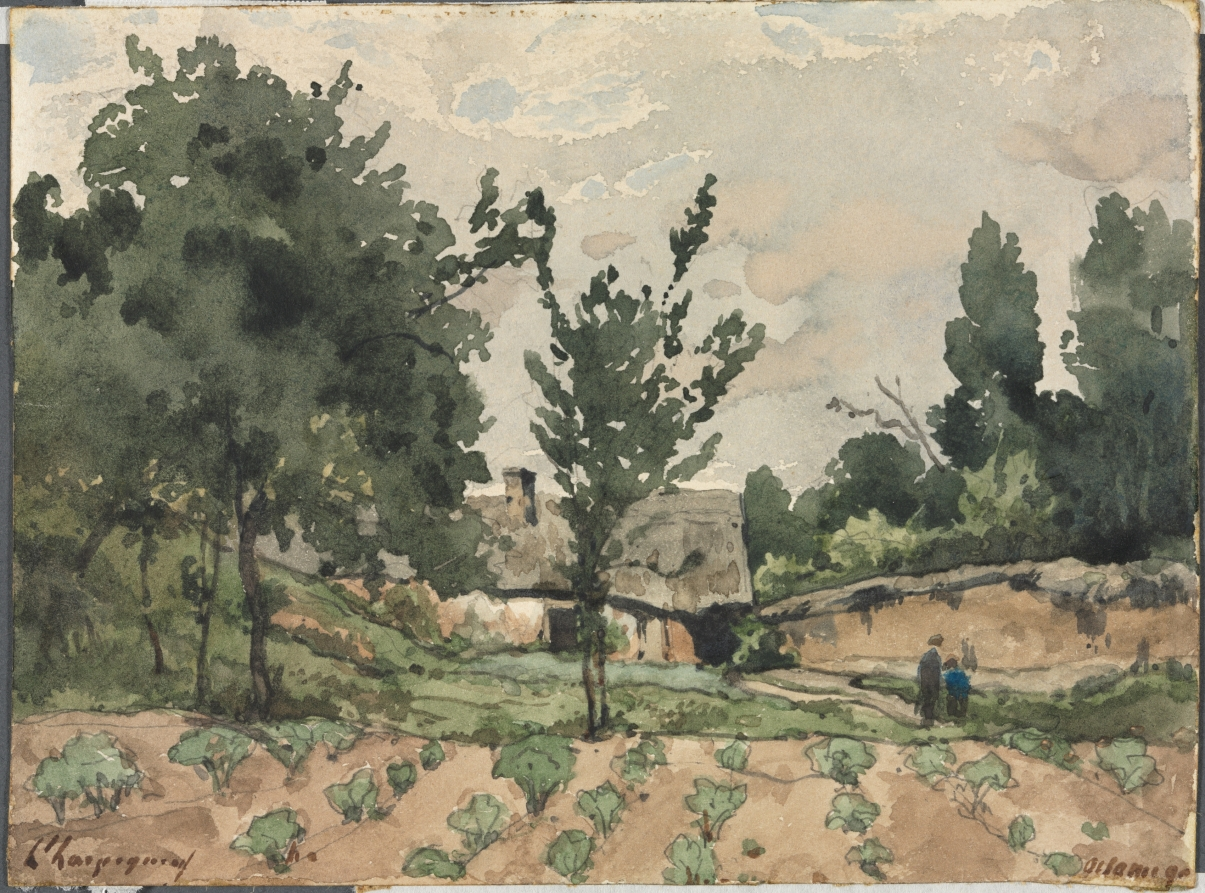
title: Landscape with Farmhouse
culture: France, 19th century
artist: Henri Joseph Harpignies (French, 1819–1916)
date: 1892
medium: watercolor with graphite underdrawing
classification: Drawing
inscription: Inscribed, lower left in brown ink: "Harpignies" Indecipherable inscription, lower right in brown ink Inscribed in brown ink (verso): "Janvier 1892 / Harpignies"